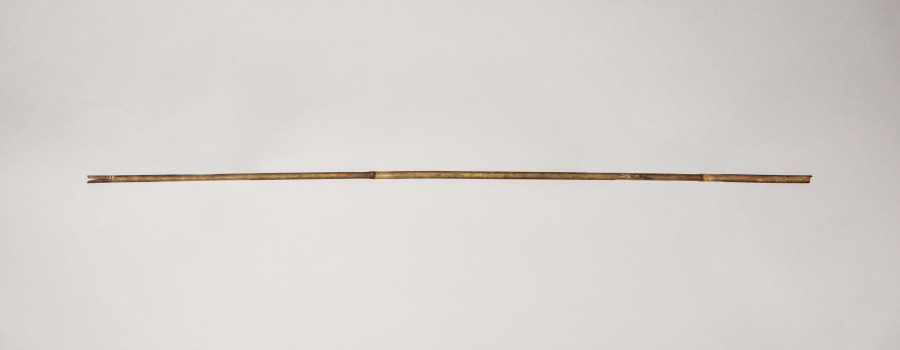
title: Arrow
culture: Philippines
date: before 1922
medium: reed shaft, wood tip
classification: Arms and Armor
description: This straight, lightweight arrow shaft is made from a single length of bamboo. Its surface is smooth and undecorated, with slight natural tapering toward the point. Shallow notches are cut at the rear end for attaching the bowstring.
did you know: The Aeta people typically used arrows like this one for hunting small game and birds.